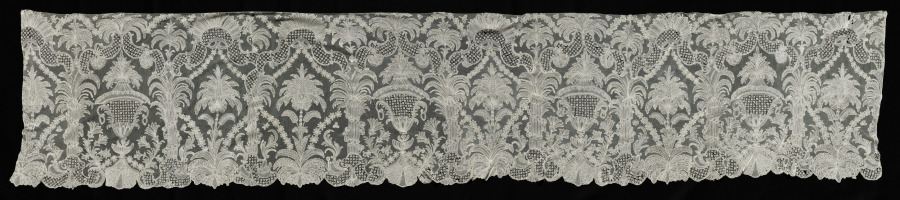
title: Lace Flounce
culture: Belgium, Brabant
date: 1700s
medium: Linen: bobbin lace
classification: Lace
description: This lace flounce depicts an urn alternating with a large floral motif.